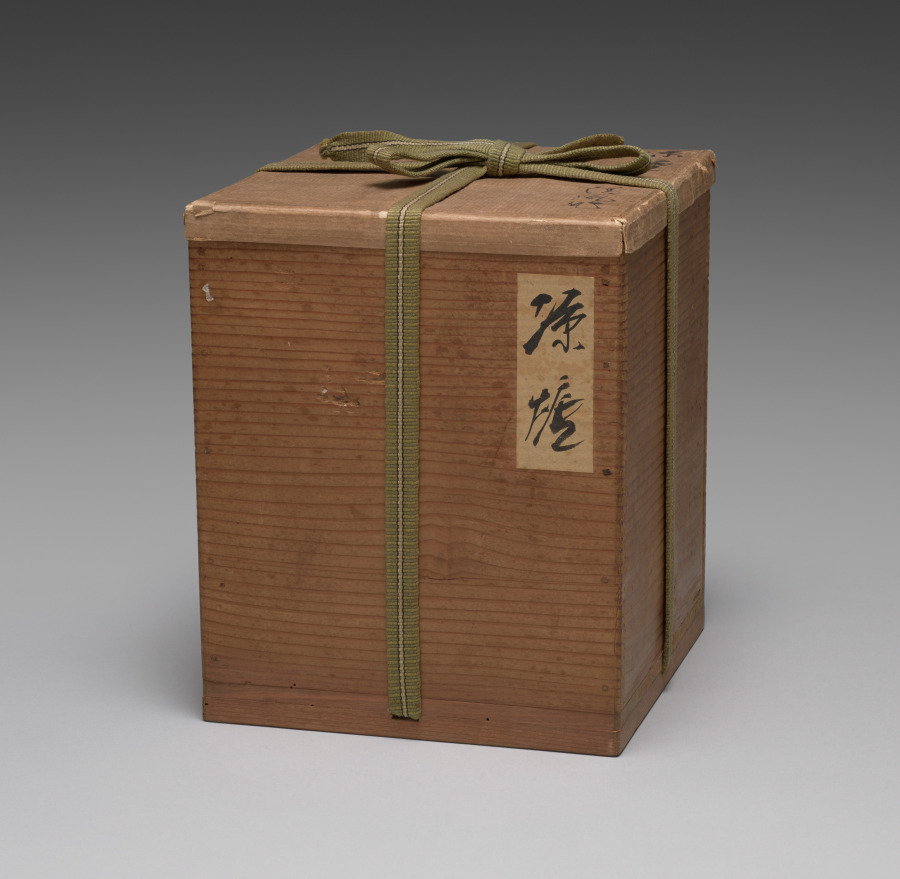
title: Brazier with Coins Motif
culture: Japan, Meiji period (1868–1912)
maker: Seifū Yohei III (Japanese, 1851–1914)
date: 1893–1914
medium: Stoneware with underglaze iron oxide designs and crackling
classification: Ceramic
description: Tall pottery braziers called ryōro are often used to heat the water for the tea served at sencha gatherings. This one sits on three sturdy legs, one of which bears the artist’s seal on its face. A horizontal rectilinear opening above this leg allows air to circulate into the lower part of the brazier. The top part is outfitted with three prongs onto which the kettle can be lowered; below them is a basin, perforated with circular holes, that holds the charcoal fuel. The brazier is decorated under the crackled transparent glaze with a design of old coins in iron oxide. The motif is cleverly chosen, for most older coins are round with a central hole, often square, which echoes the cylindrical form of the brazier with its rectilinear “wind gate,” or fūmon.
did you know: One coin is painted with the Japanese god of wealth, Daikokuten, standing upon two bales of rice.